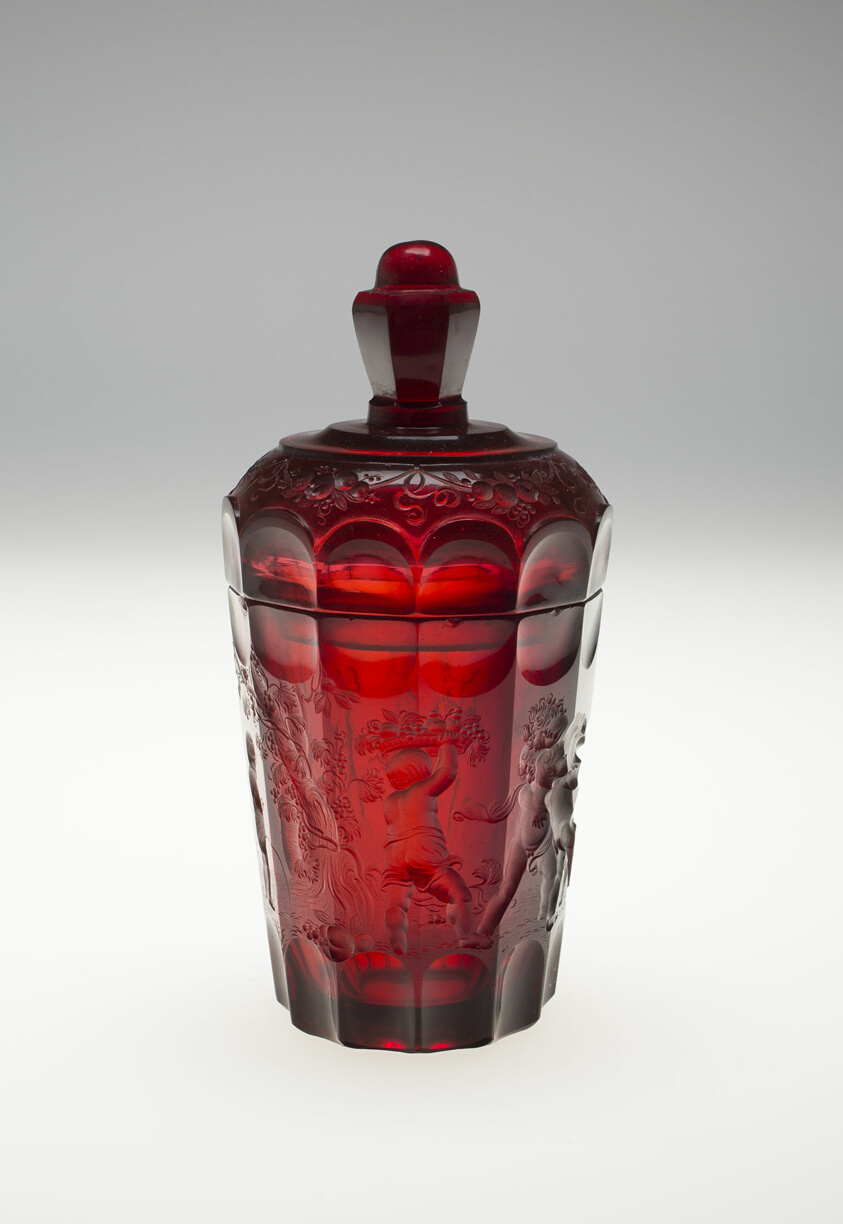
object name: Glass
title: Beaker with Cover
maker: Engraving attributed to Gottfried von Spiller (German, born Czechoslovakia, c. 1663–1728); Germany, Potsdam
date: 1685–1700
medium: Ruby glass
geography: Potsdam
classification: glass; european decorative arts